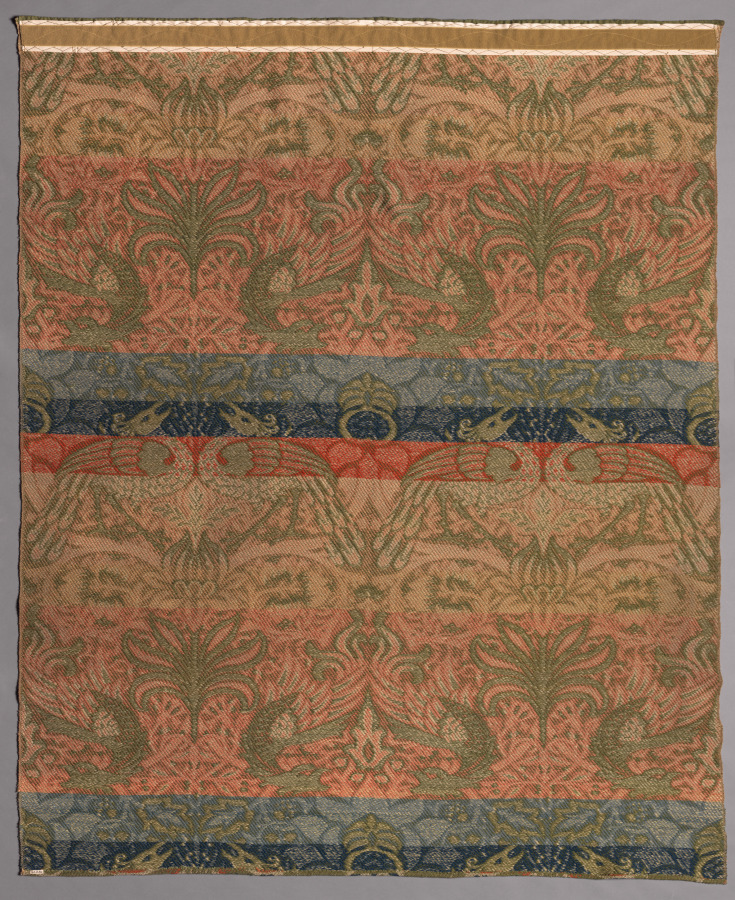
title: Peacock and Dragon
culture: England, Surrey, Merton Abbey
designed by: William Morris (British, 1834–1896)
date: 1878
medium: weft-faced compound twill; wool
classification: Textile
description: Morris sought to produce textiles that could function as he imagined medieval wall hangings had, bringing warmth to stone-cold rooms. Boldly designed with soothing colors in thick wool, Peacock and Dragon is the closest Morris came to achieving this ideal. In the same year he designed this textile, Morris visited the shop of the London dealer Vincent Robinson, where he saw a room re-created from Damascus, “all vermillion and gold and ultramarine, very beautiful, and is just like going into the Arabian nights.” It partly inspired the exotic motifs seen here. This design was one of the most popular among Morris’s customers; it was available in five colorways.